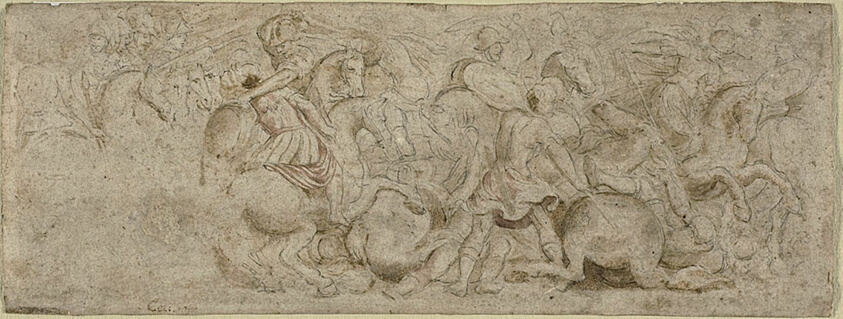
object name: Drawing and Watercolor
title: Battle Scene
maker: Unknown Artist; Italian, 16th/17th century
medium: Black chalk and graphite, heightened with brush and brown and red wash, on buff laid paper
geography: Italy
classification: ink or chalk wash; drawings (visual works); prints and drawing